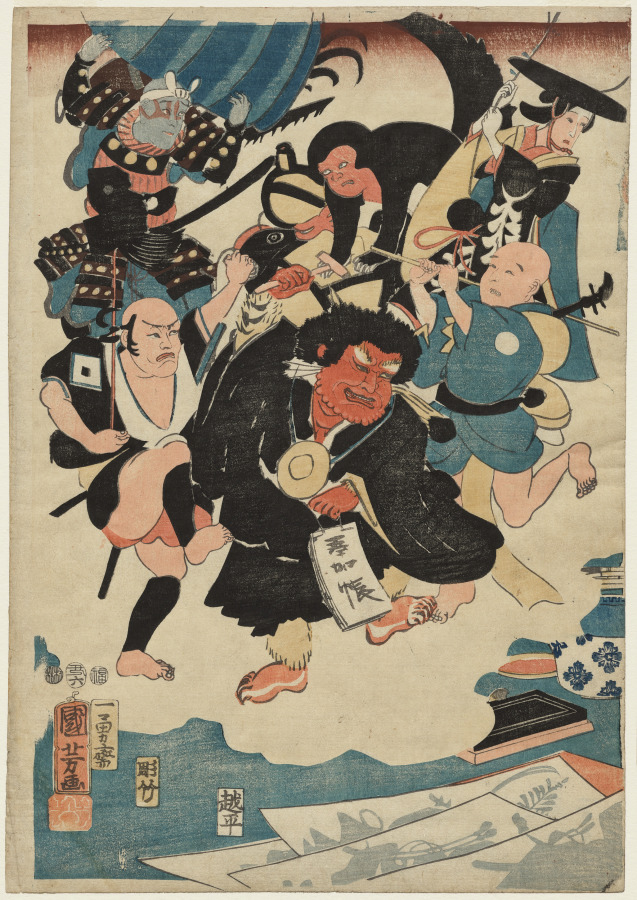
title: The Strange Occurrence of Ukiyo Matahei and his Famous Paintings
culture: Japan, Edo period (1615–1868)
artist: Utagawa Kuniyoshi (Japanese, 1797–1861)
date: 1853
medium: color woodblock print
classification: Print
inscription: Signature: Ichiyusai Kuniyoshi ga Artist Seal: paulownia Publisher: Echimura Heisuke (Echihei) Engraver: Hori Take Censorship Seal: Muramatsu, Fuku